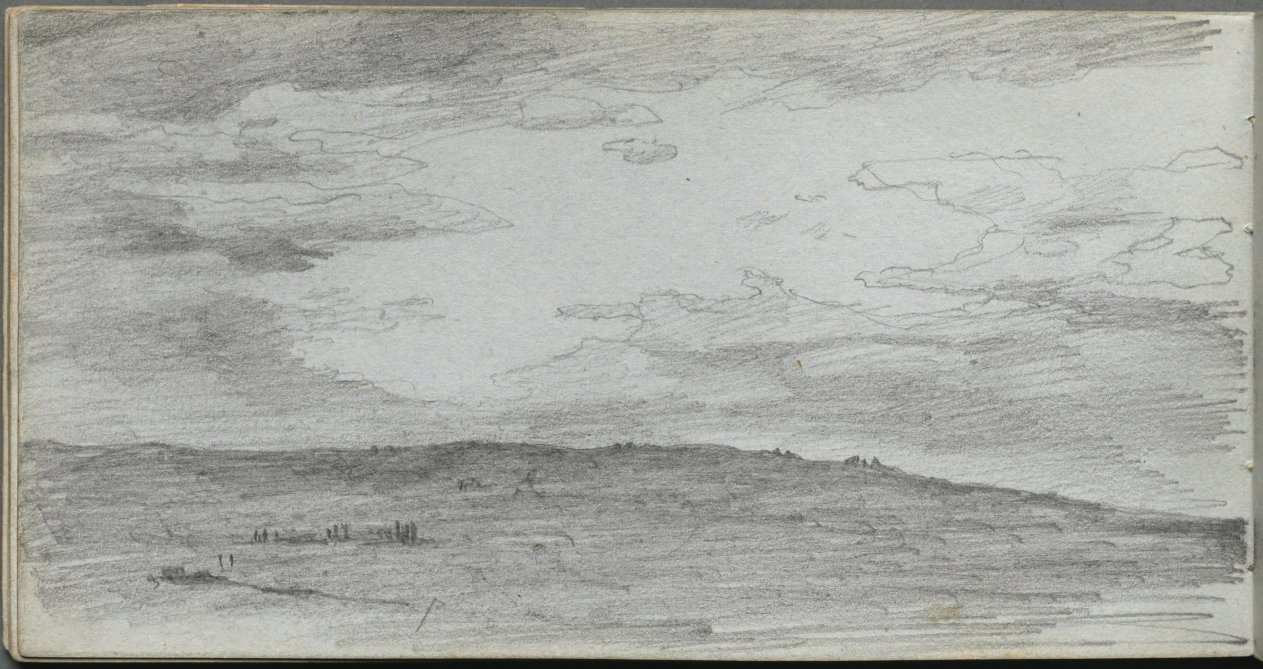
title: Sketchbook, page 34: Landscape Study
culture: France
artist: Ernest Meissonier (French, 1815–1891)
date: c. 1860s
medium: graphite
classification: Bound Volume